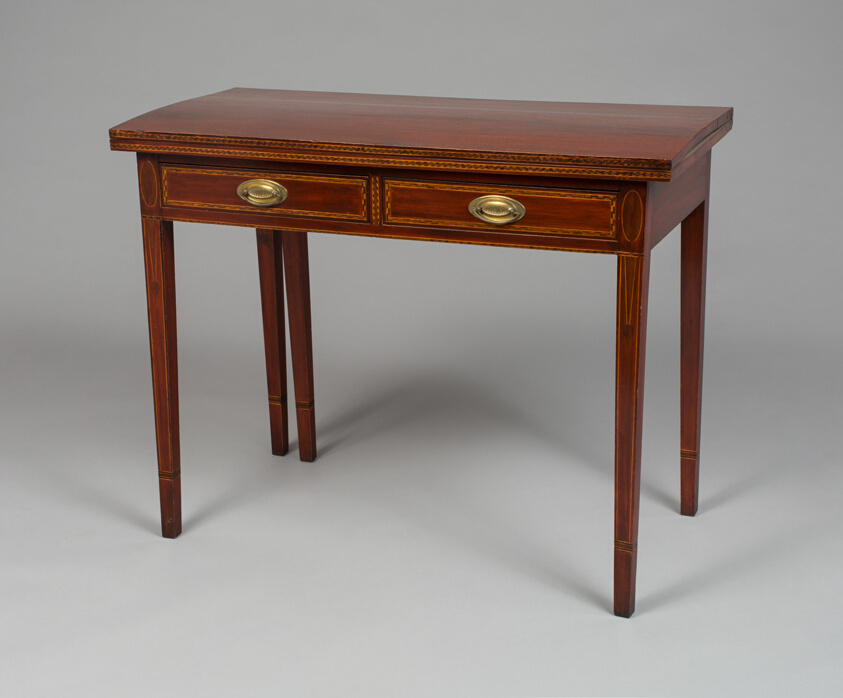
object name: Furniture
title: Card Table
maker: Artist unknown (American, 19th century); Rutland, Vermont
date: 1805–15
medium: Birch, white pine, rosewood, walnut, maple, and mahogany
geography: Rutland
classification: table; furniture; american decorative arts; american arts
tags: furniture